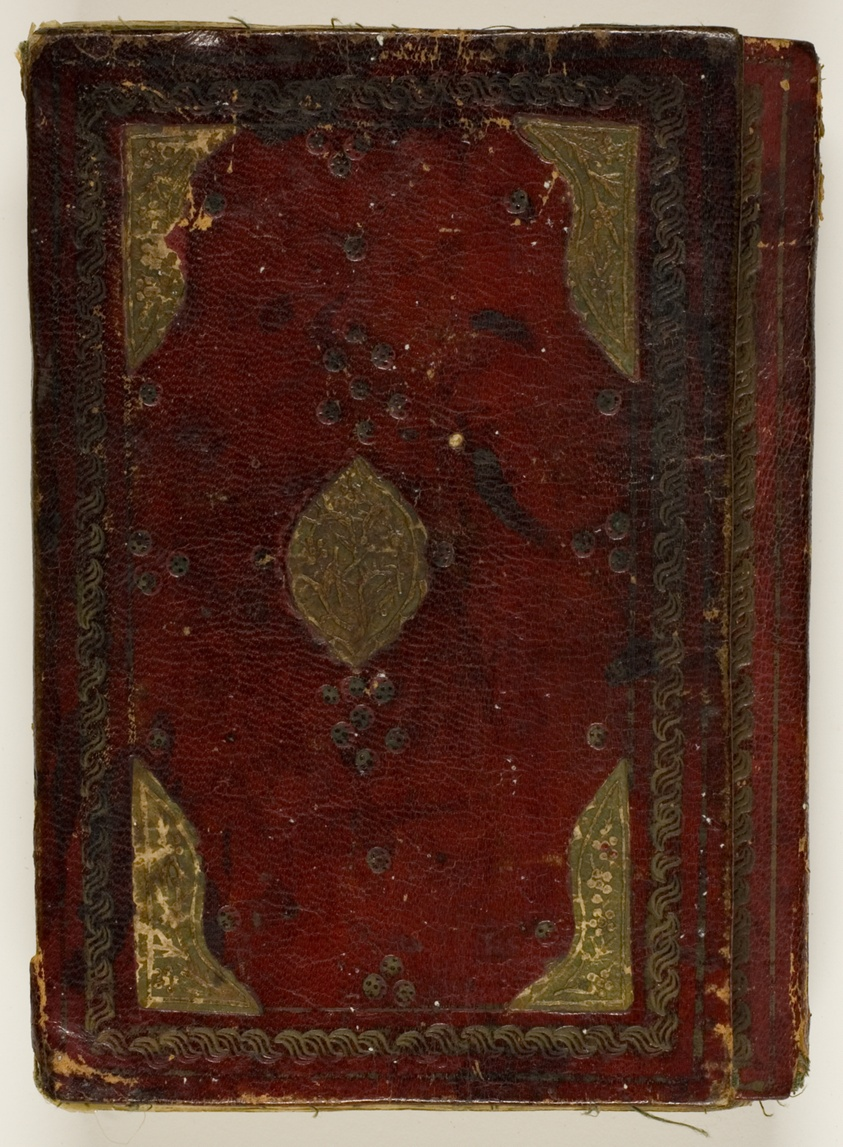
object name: Book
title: Qur'an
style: Islamic (culture or style)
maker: Egypt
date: Ottoman Egypt (1517–1867), c.1816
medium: Ink and gold on paper with leather binding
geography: Egypt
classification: manuscript; asian art; book